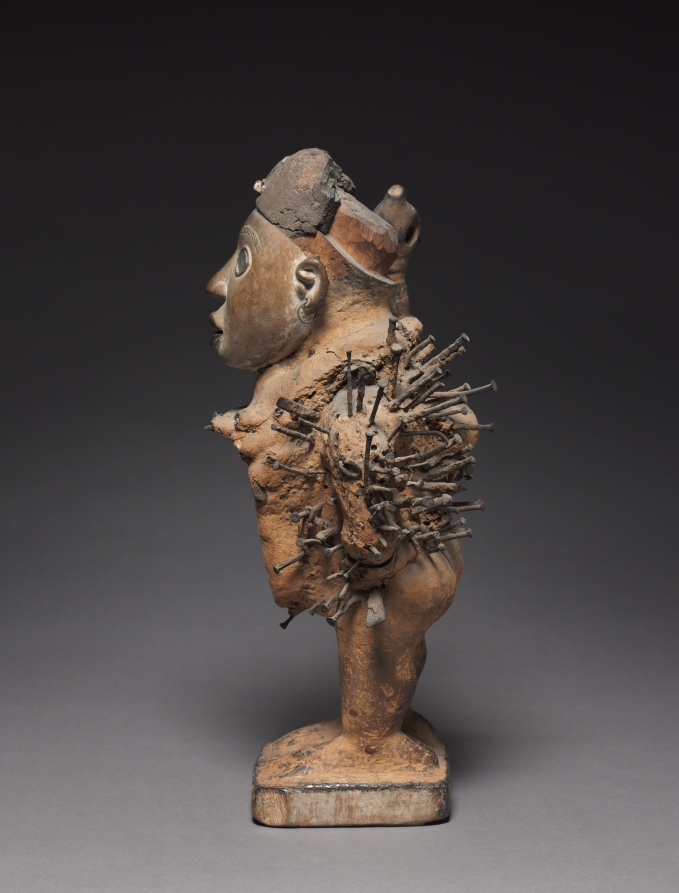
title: Male figure (nkisi nkondi)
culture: Democratic Republic of Congo or Cabinda (Angola), Kongo artist and nganga (priest)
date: late 1800s-early 1900s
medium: Wood, metalized glass, iron, organic material, ivory or plastic, and natural fiber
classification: Sculpture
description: This nkisi nkondi (power figure) lacks most of the materials that transformed it into a vessel for a spirit. Carved by sculptors, minkisi hosted spirits after banganga (priests) placed substances inside to empower them. The mirrored eyes, resin cap, and stomach chamber once contained empowering materials. After the nkisi had served its purpose the nganga removed the materials, stripping it of its spiritual power; the remaining sculpture was discarded. Sometimes, Kongo people removed materials as acts of anti-colonial resistance, disempowering minkisi before Europeans seized them. While we don’t know why it was disempowered, this sculpture is no longer spiritually active.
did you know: A mix of locally made and imported metal nails, blades, and screws cover this figure.